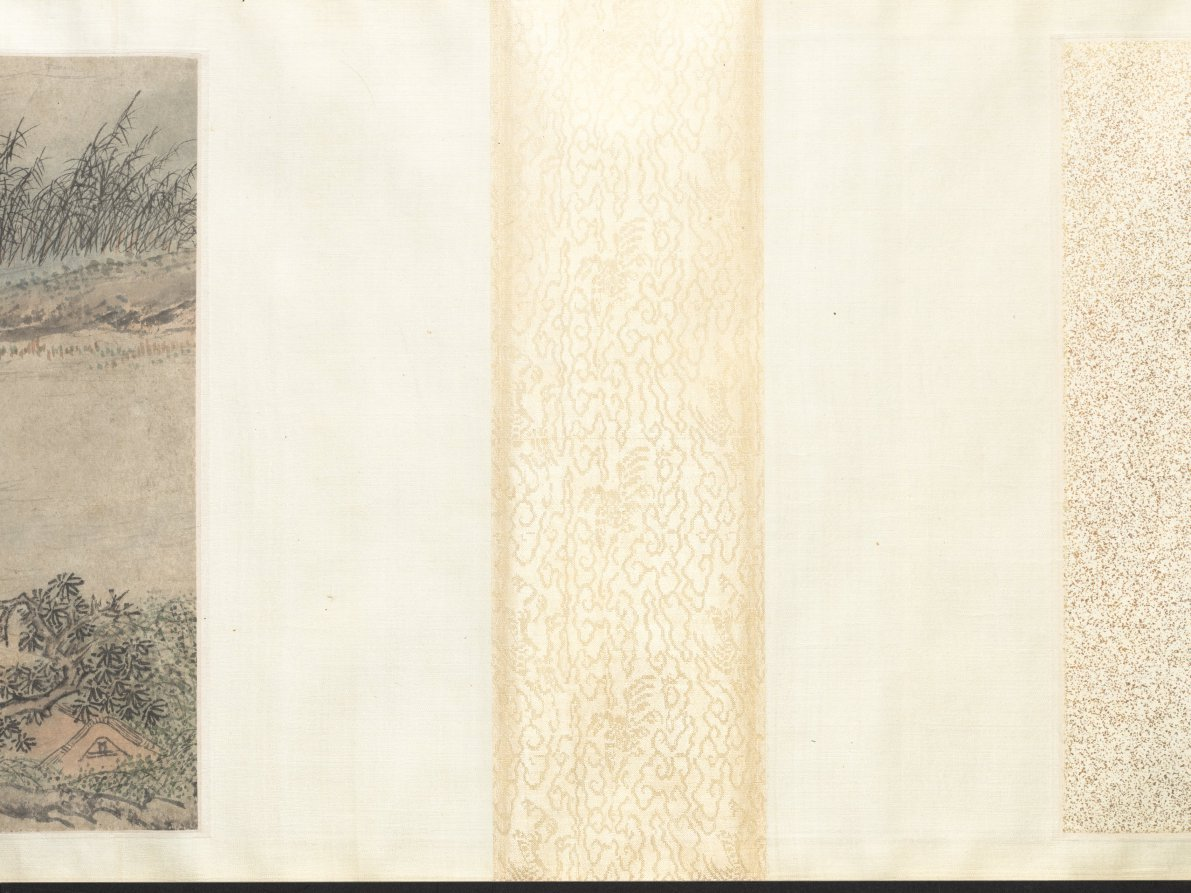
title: Fisherman's Joy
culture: China, Ming dynasty (1368–1644)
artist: Qian Gu (Chinese, 1508–c. 1578)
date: 1572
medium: Handscroll; ink and light color on paper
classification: Painting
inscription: Artist's inscription, signature, and seal: On the autumn day of the jen-shen year [1572], P'eng-ch'eng, Ch'ien Ku painted [this]. [seal] Hsüan-ch'ing shih. 2 colophons, both dated 1689, and 5 additional seals of Yün Shou-p'ing (1633-1690).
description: This painting has a scene showing two small crafts, each manned by two fishermen, practicing a traditional fishing method. In one of them, a man uses a bamboo pole to direct the movements of a cormorant bird sent into the water. Cormorant fishing, witnessed in some areas of the lower Yangzi River, appears in Zhe school paintings. Qian Gu may have borrowed these narrative figure scenes from Zhe school paintings, while his vantage point, brushwork, and soft tones align with the Wu school style. Scenes of fishermen appealed to urban and educated audiences who idealized the self-sufficient independence of fisherfolk.